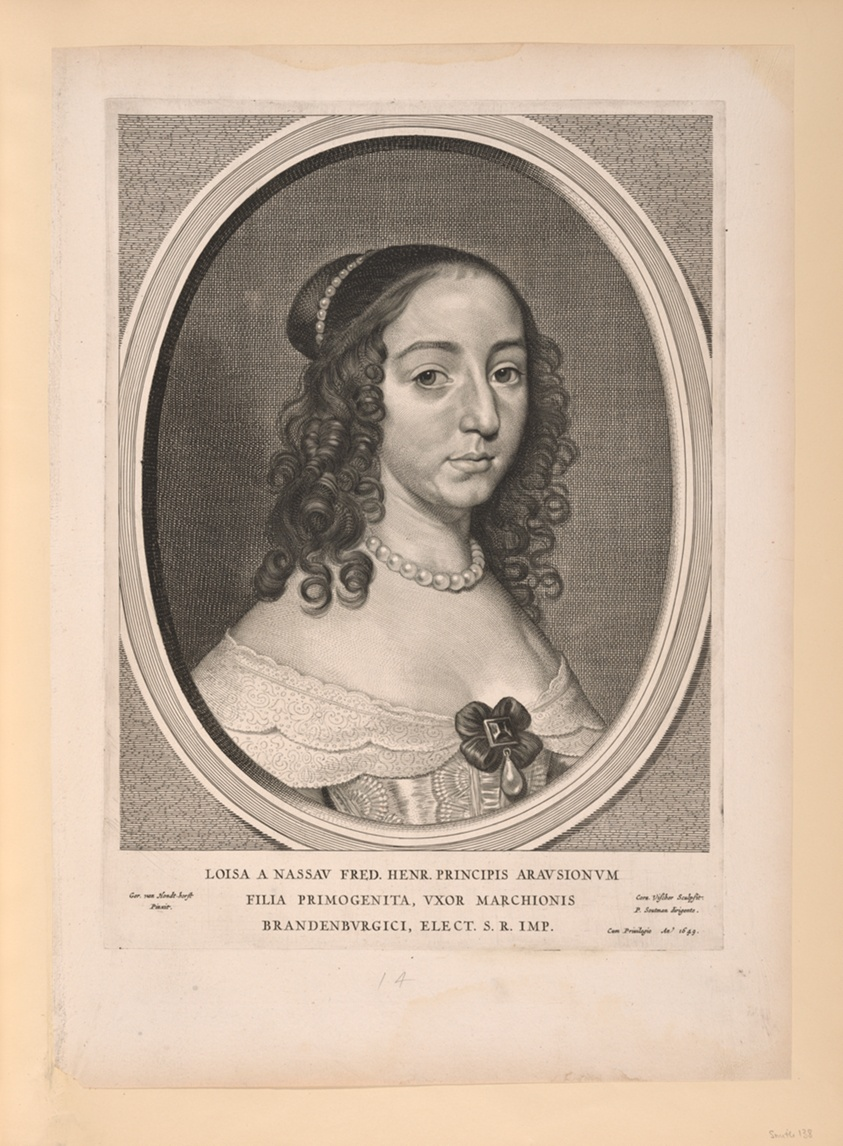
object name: Print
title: Louise Henrietta, Princess of Orange Nassau, from Nine Portraits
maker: Cornelis Visscher (Dutch, c. 1629-1658); after Gerrit van Honthorst (Dutch, 1592-1656)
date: 1649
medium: Engraving on paper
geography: Netherlands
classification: engraving; paper; print; prints and drawing